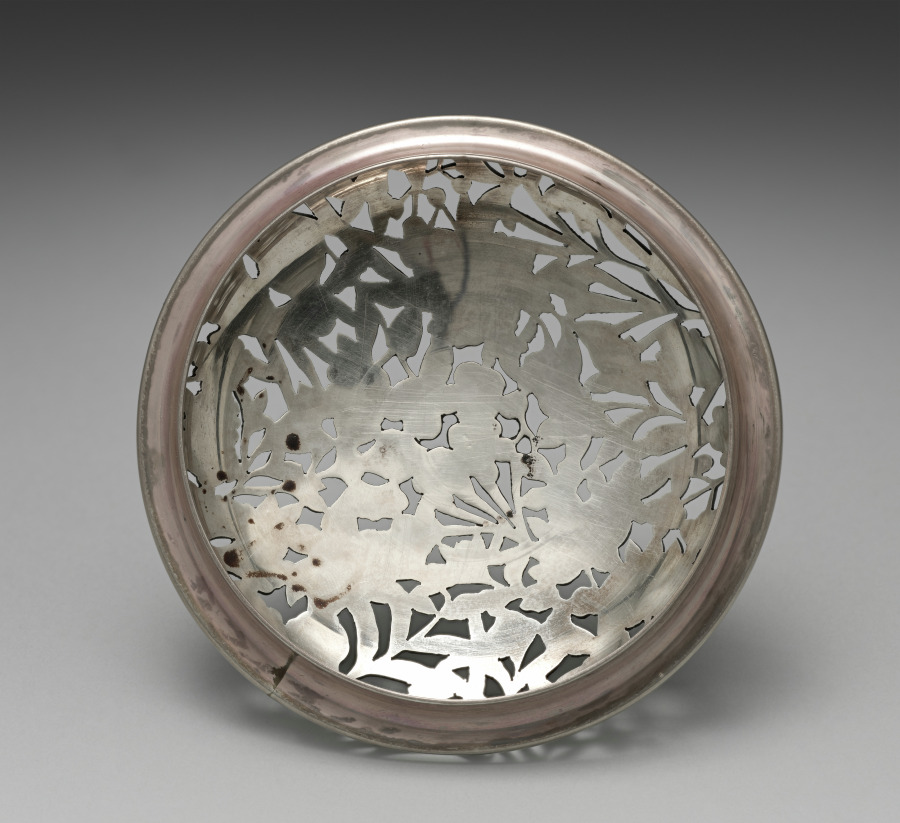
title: Lid for an Incense Burner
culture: Japan, Meiji period (1868–1912)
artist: Seifū Yohei III (Japanese, 1851–1914)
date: 1893–97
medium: Floral openwork silver lid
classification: Ceramic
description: Seifū Yohei III made incense burners in a wide variety of designs and styles. This tripod incense burner has a distinctive red-colored glaze and linear molded decorations that run around the base of the collar and down the legs. It has a variety of flowers on its lid. The glaze is described as “crimson glaze” (kōyū); it is also dappled with dark spots of varied opacity and tiny pores throughout, which gives the container a rich, textured effect.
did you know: The silver lid was produced outside the studio by metalwork specialists.